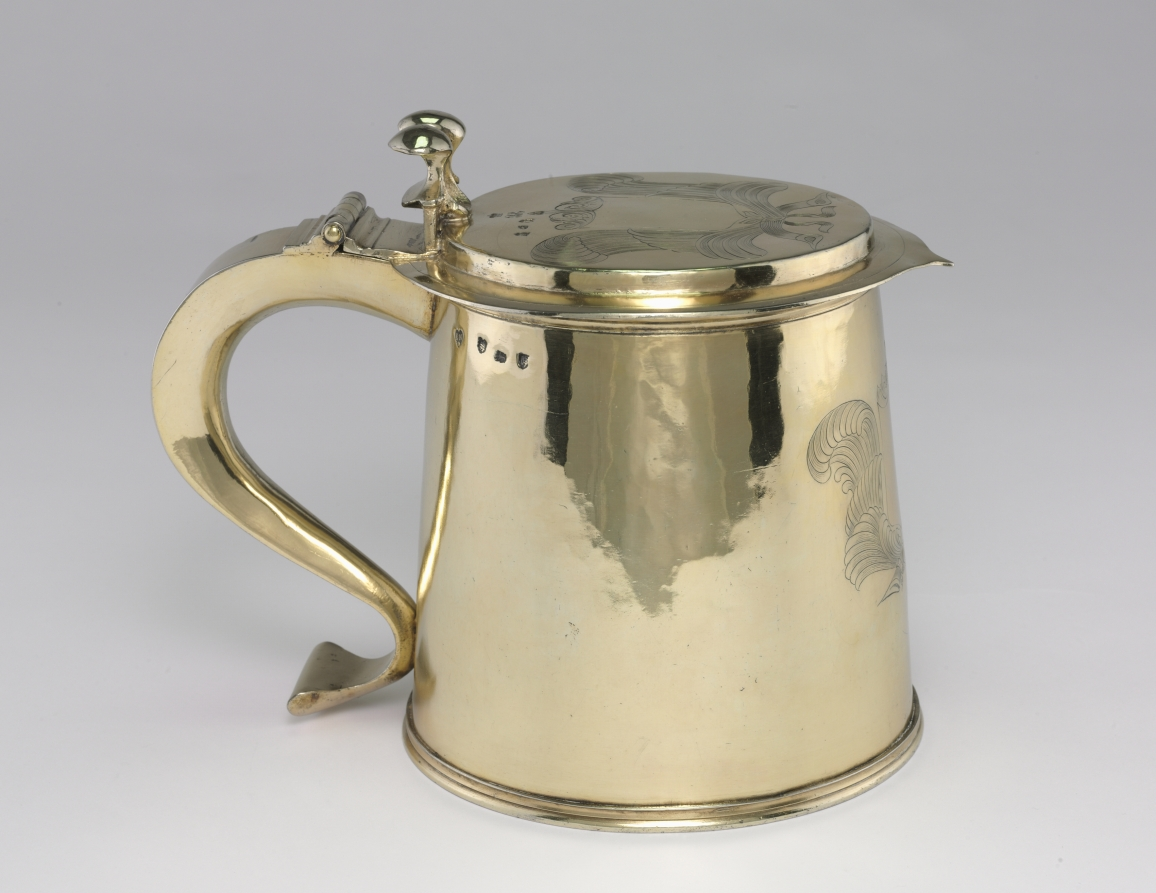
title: Tankard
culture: England, London, 17th century (Charles II)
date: 1665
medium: silver gilt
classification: Silver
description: Silver fulfilled a prominent role in projecting wealth, status, power, and ritual in British life during the 1600s and 1700s. Elaborate forms such as two-handled cups, trophies, trays, and centerpieces not only represented wealth in their sheer silver weight but also provided royal and aristocratic owners a surface for displaying engraved coats of arms, projecting identity and social status. Less wealthy individuals made do with more functional items such as this tankard. The empty cartouches on the drinking vessel suggest that it was produced without a specific patron in mind and that a coat of arms was intended to be added at a later time.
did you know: Tankards, with their characteristic hinged covers, scroll handles, and lobed thumbpieces, were used to drink beer or ale.